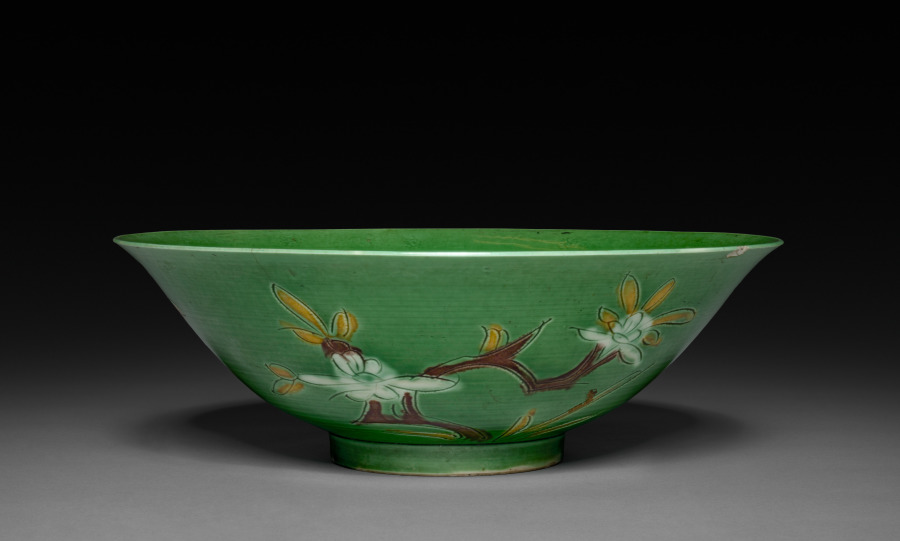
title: Bowl with Sprays of Flowers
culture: China, Jiangxi province, Jingdezhen kilns, Qing dynasty (1644-1911), Kangxi reign (1662-1722)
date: 1662–1722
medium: porcelain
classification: Ceramic